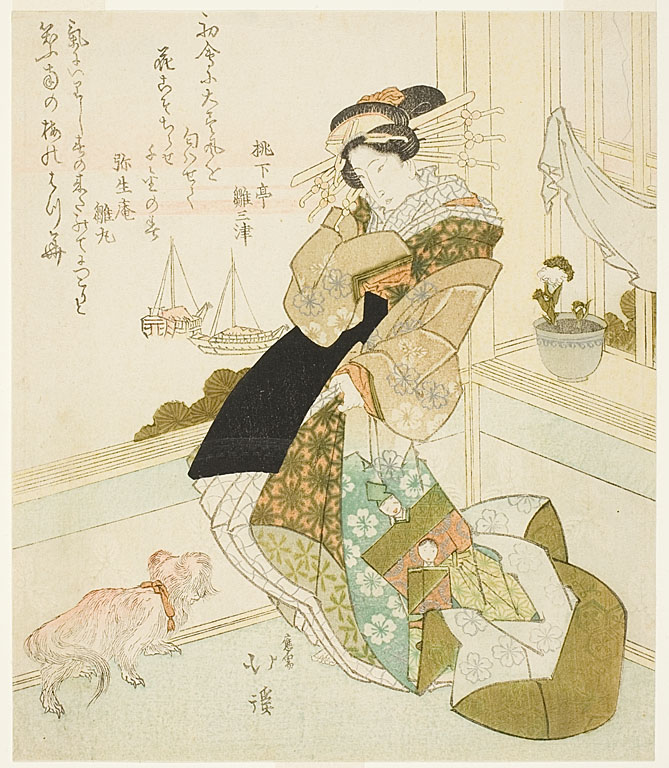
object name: Print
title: Courtesan and Pekingese Dog at New Year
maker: Totoya Hokkei (Japanese, 1780-1850)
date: early 19th century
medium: Color woodblock print; surimono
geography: Japan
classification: woodblock print; print; asian art